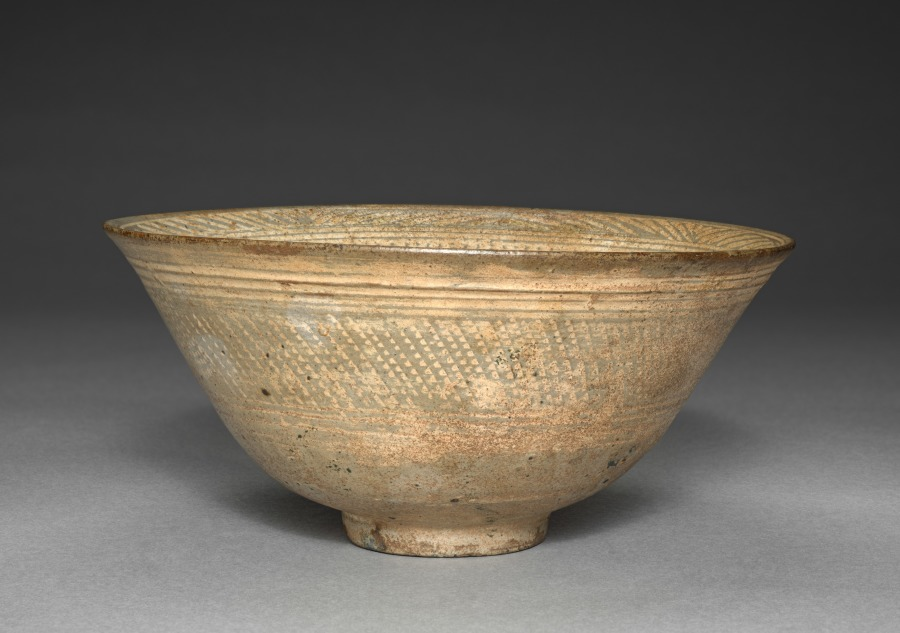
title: Bowl with Stamped Floral Decoration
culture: Korea, Joseon dynasty (1392–1910)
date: 1600s–1700s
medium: glazed ceramic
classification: Ceramic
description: This type of wide-mouthed bowl was used everyday in Korea, not exclusively for tea drinking. But when it was introduced to Japan around the early 16th century, its imperfect appearance evoking the aesthetics of wabi-sabi caused it to be repurposed as tea bowls in Japan. Possibly produced in one of the kilns established by the trading office (Waegwan) in Busan, southern Gyeongsang province, this type of bowl was sold to Japanese elite collectors.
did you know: This type of humble tea bowl was highly praised among Japanese collectors for its imperfect beauty.